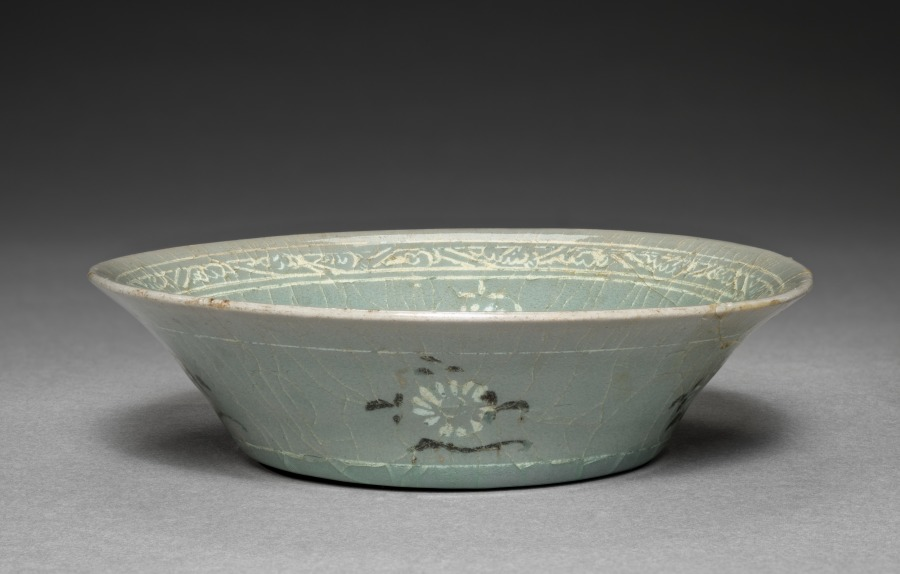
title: Dish with Inlaid Chrysanthemum Design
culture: Korea, Goryeo dynasty (918–1392)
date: 1200s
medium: ceramic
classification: Ceramic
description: Celadon wares used for everyday such as this dish were among the most common burial objects in tombs during the Goryeo period (918–1392). Furnishing tombs with an elaborate assemblage of objects was believed to honor and comfort the newly dead. Generally, Goryeo tombs were left untouched until the late 1800s. During the colonial period (1910–45), however, Japanese archaeologists competitively excavated the tombs located in Kaeseong, the former capital of the Goryeo period, and these wares soon became available for Japanese and Western collectors.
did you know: On the base of this tea bowl, three small spur marks made of bits of clay remain visible, indicating an individual protective casing of fire clay (saggar).